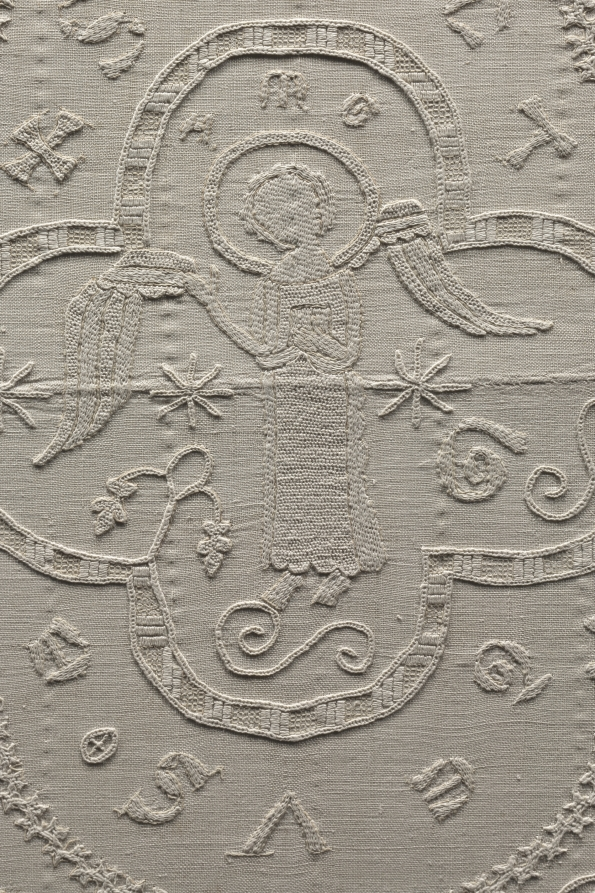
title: Altar Cloth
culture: Germany, Altenberg on the Lahn, Premonstratensian Convent, 14th century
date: c. 1350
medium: embroidery: linen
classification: Embroidery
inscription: various motifs enclosed in quatrefoils with identifying inscriptions in Gothic letters.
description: This large, embroidered altar cloth is one of the rarest, most important medieval church furnishings in existence. It was stitched by nuns in the Premonstratensian Convent in Altenberg on the Lahn River, north of Frankfurt, Germany, and was used to cover the church’s high altar in the weeks leading up to Easter. The cloth is an example of linen embroidery, a specialty of German nuns in the later Middle Ages. The Altenberg monastery church once had valuable furnishings; the high altar retable (a decorated frame with sculptures and paintings on the top of an altar) has survived, the main parts of which are now in the Städel Museum in Frankfurt, Germany.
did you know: When lit from behind, the previously hidden details emerge and the complex design becomes evident.